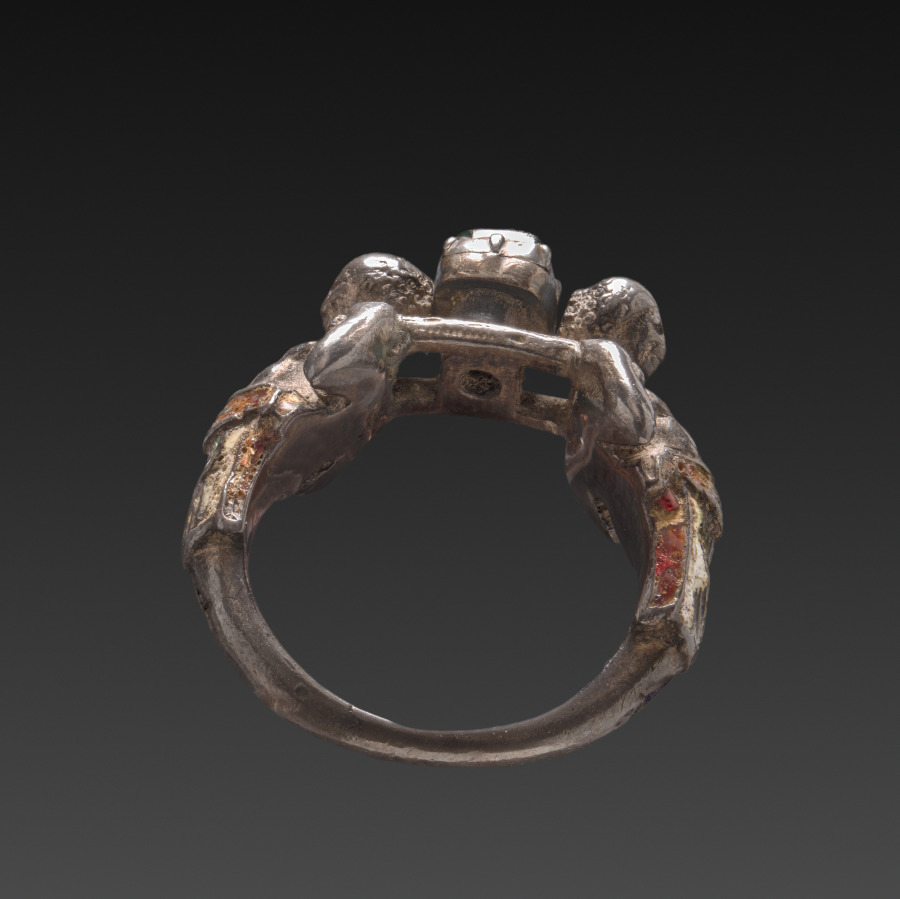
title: Ring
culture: Italy, 18th century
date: 1700s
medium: silver and emerald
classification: Jewelry